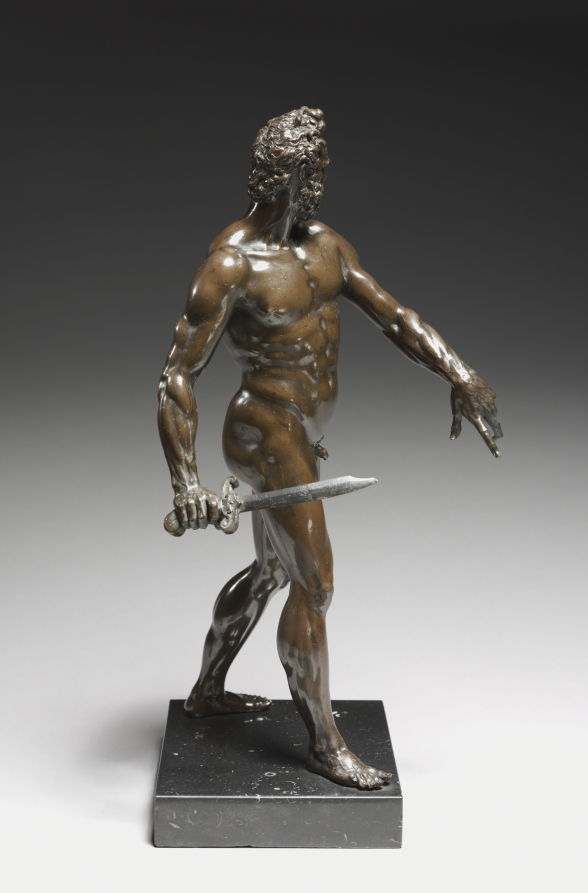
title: Mars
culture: Italy, 16th century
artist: Giambologna (Flemish, active Italy, 1529–1608)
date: c. 1584–87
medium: bronze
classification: Sculpture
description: Although he is lacking the helmet and armor common to Mars in Roman iconography, this figure is identified as the ancient god of war. Mars pauses mid-stride, swinging his sword arm back to strike an enemy in his gaze; this dynamic composition is typical of Giambologna’s models. Collectors prized small bronzes such as this and often kept them in special rooms along with antiquities, coins, shells, and other curiosities. Easy to hold and arrange due to their small size, they were appreciated through touch as well as sight.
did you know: The active, twisting pose indicates that the statue was designed to be viewed in the round.